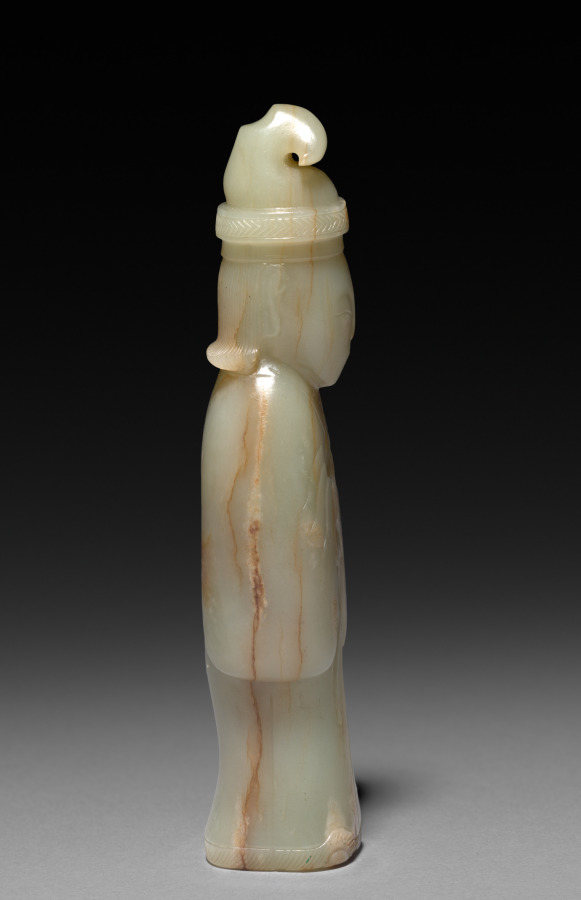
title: Standing Figure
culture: China, Qing dynasty (1644-1911)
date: 1644–1911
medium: jade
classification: Jade